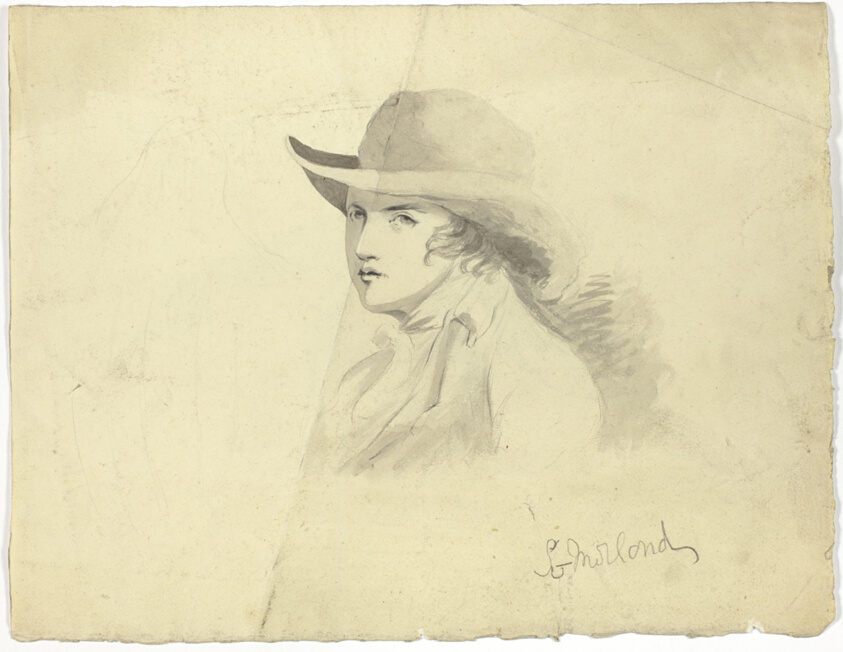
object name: Drawing and Watercolor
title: Bust of Youth Wearing Hat (recto); Angel Head (verso)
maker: After George Morland; English, 1763-1804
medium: Brush and gray wash, and graphite (recto and verso), on cream wove paper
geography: England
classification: ink or chalk wash; drawings (visual works); prints and drawing